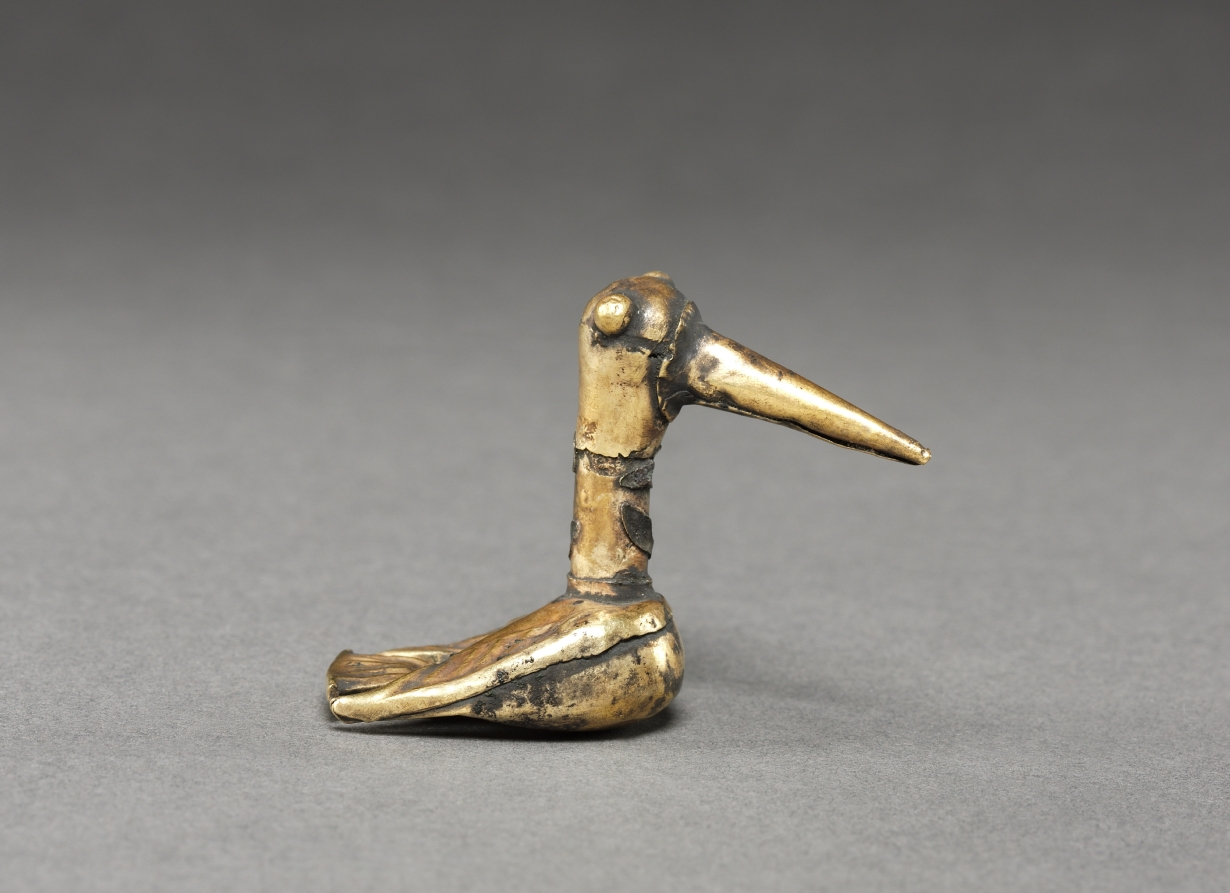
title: Bird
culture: Peru, North Coast, Chimú Culture, 13th-15th century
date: 1200s-1400s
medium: bronze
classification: Metalwork